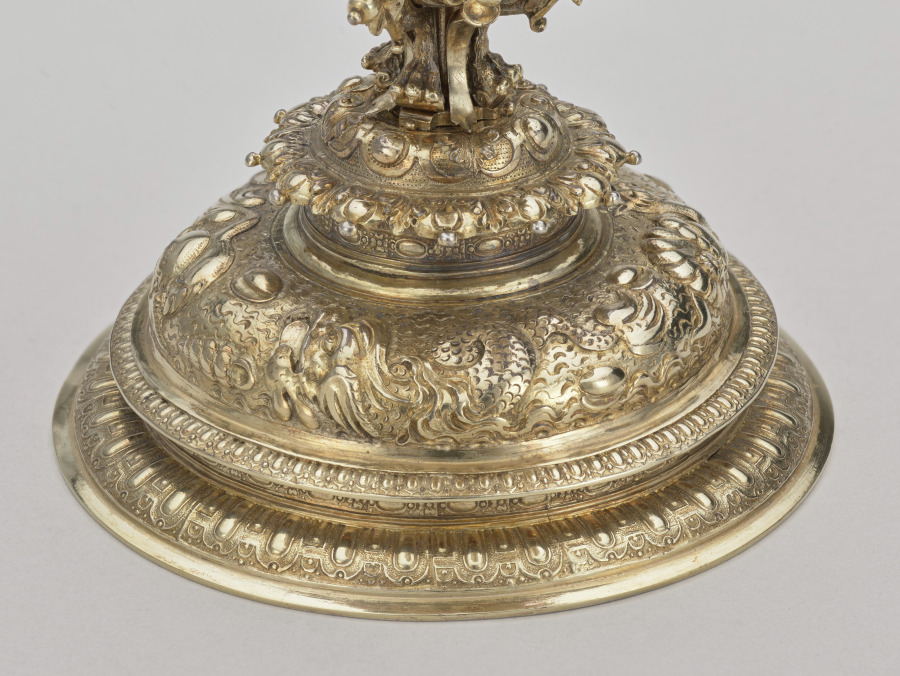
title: Nautilus Cup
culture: Netherlands, Holland, Delft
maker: Cornelis Jansz van der Burch (Dutch, active in Delft, d. 1615)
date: 1607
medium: Silver-gilt, nautilus shell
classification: Metalwork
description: Nautilus shells were brought to the Netherlands from Indonesia. Skilled Dutch silversmiths mounted them in silver, creating luxurious vessels that were sought after by wealthy collectors. Early Dutch nautilus cups are mainly associated with the city of Delft, although only a few other examples made in Delft are known from the late sixteenth and early seventeenth centuries. They feature the dramatic motif of a sea monster’s head.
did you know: The nautilus is a marine mollusk that swims by expelling water from its shell using jet propulsion.